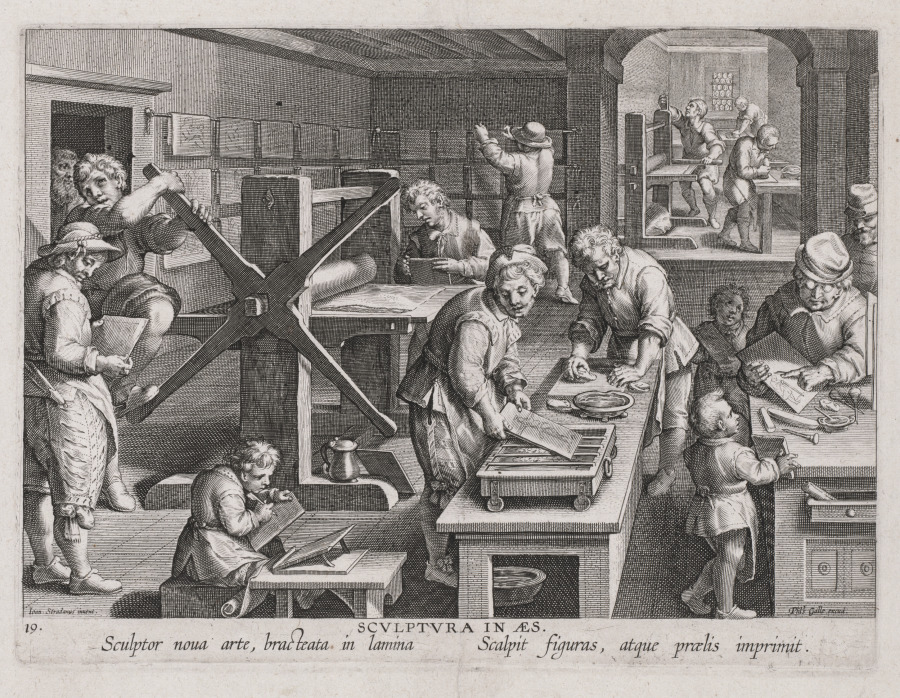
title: Sculptura in Aes, The Workshop of an Engraver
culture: Flanders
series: Nova Reperta (New Inventions of Modern Times)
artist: Jan van der Straet, called Johannes Stradanus (Netherlandish, active Italy, 1523–1605)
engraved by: Philip Galle (Flemish, 1537–1612)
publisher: Philip Galle (Flemish, 1537–1612)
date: c. 1591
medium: engraving on antique laid paper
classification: Print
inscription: In plate: signed at bottom left, “Ioan. Stradanus inuent"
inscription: address at bottom right, Ph[i]l[ip]s Galle excud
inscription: title and one line of Latin in margin: SCVLPTVRA IN AES. | Sculptor noua arte, bracteate in lamina Scalpit figuras, atque praelis imprimit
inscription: numbered bottom left 19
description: This engraving, made in 1591, is an important document of the printmaking process in the 1500s. The artist Johannes Stradanus portrayed the stages of making an engraving from right to left. First, the engraver carved the plate; then, it was inked and wiped. One man is shown pulling a plate from an acid bath (illustrating the etching process). Finally, the inked plate was printed on a large roller press. The finished prints were hung to dry. The engraving was one of a series of prints Stradanus made that documented important inventions of the period, ranging from the eyeglass, to distillation, to gunpowder.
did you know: This engraving illustrates the process of making an engraving in the late 1500s, from carving the plate to inking and printing.